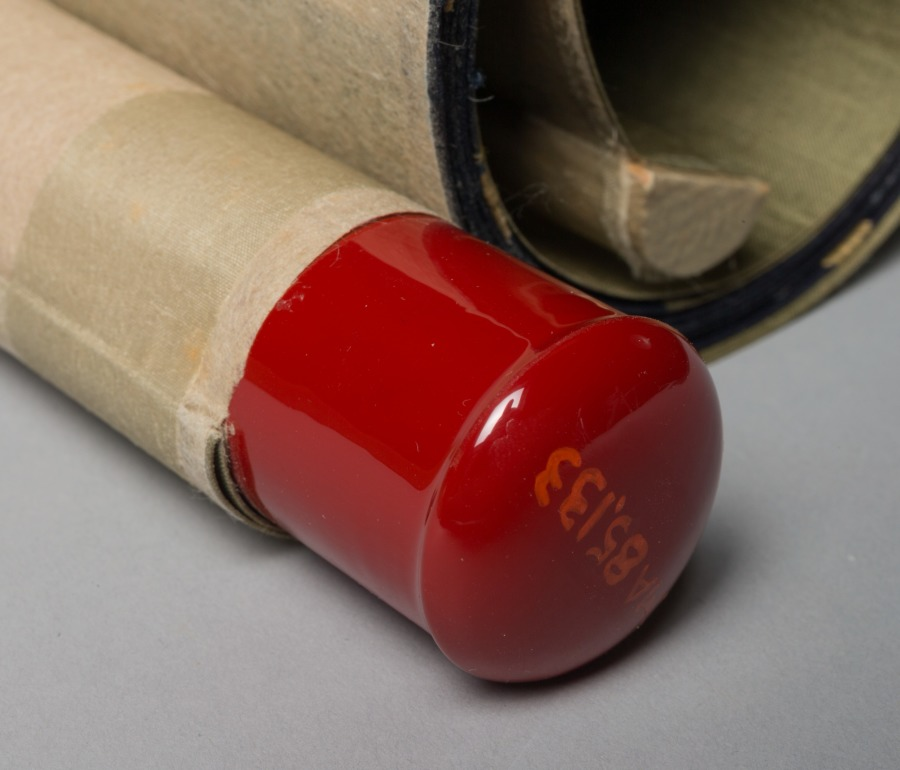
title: A Couple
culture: Japan, Momoyama period (1573–1615)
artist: Hasegawa Sōen (Japanese)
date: late 1500s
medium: hanging scroll; ink on paper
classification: Painting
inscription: Artist's seal at lower left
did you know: The person on the right holds a spray of chrysanthemums, while the other has daffodils suspended upside down from a stalk held over their shoulder.